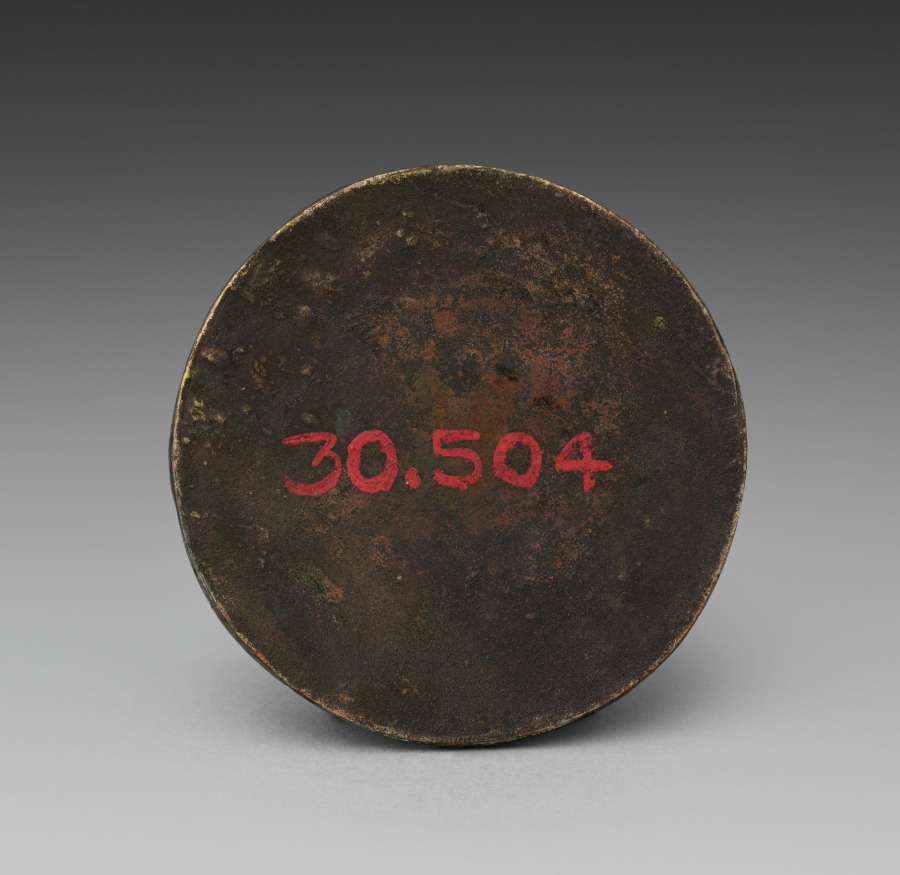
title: Medallion with the Bust of Christ ("The Cumberland Medallion"), from the Guelph Treasure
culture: Germany, Weserraum, Migration period, late 8th century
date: late 700s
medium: cloisonné enamel and gold on copper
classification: Enamel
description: This medallion may have originally served as a sacerdotal brooch and is the earliest object from the Guelph Treasure, the ecclesiastical treasure of Germany’s Braunschweig (Brunswick) Cathedral.